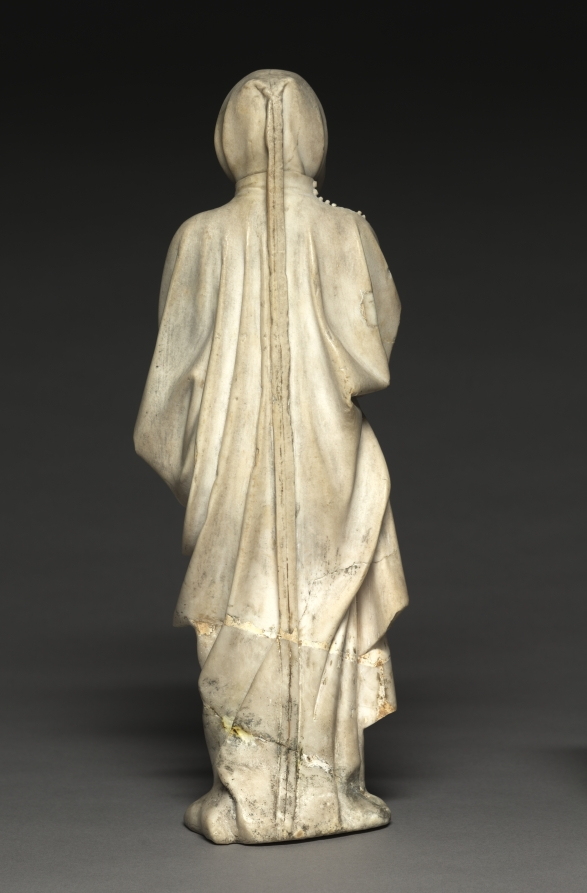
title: Mourner from the Tomb of Philip the Bold, Duke of Burgundy (1364–1404)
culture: Netherlands, active Dijon, 15th century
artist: Claus de Werve (Netherlandish, 1380–1439)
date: 1404–10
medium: vizille alabaster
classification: Sculpture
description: This figure comes from the tomb of Duke Philip the Bold from the church of Champmol near Dijon (Burgundy, France). Philip, who founded the monastery and designated it as his burial place, hired the best artists, many of whom came from the Netherlands. While the commission was given in 1381, the work was not completed until 1410, six years after the duke’s death. This mourner is unusual for the time because it is not carved as a static low relief on the pedestal of the tomb but interacts with the viewers and their fellow procession members. The lifelike quality of the figure is due in large part to the alabaster. Its softness allowed artists to carve details into the material, and the transparent, milky white stone could also be polished to a high gloss.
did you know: A plaster cast of this mourner decorates the empty niche in the Tomb of Philip the Bold in Dijon, France.